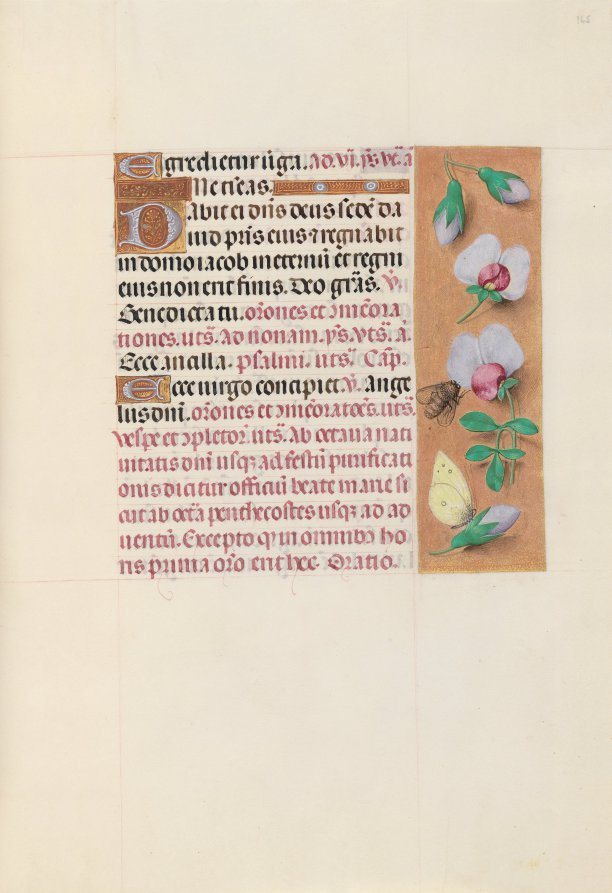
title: Hours of Queen Isabella the Catholic, Queen of Spain: Fol. 165r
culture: Flanders, Ghent and Bruges, late 15th century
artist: Master of the First Prayerbook of Maximillian (Flemish, c. 1444–1519)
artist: and Associates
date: c. 1500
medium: ink, tempera, and gold on vellum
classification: Bound Volume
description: This manuscript was illuminated by a circle of at least five highly organized manuscript painters active in the Flemish cities of Ghent and Bruges. The principal illuminator was Alexander Bening, who painted the majority of the book's miniatures. Manuscripts produced by this circle of artists are renowned for the decoration of their borders, which typically feature a rich variety of realistically-painted flowers, birds, and butterflies. This prayer book, called a book of hours, was intended not for a cleric, but for the private devotions of a lay person-in this case, Isabella the Catholic, Queen of Spain (1451-1504). Isabella's coat of arms embellishes the book's frontispiece. It is unlikely that the book was commissioned by the Queen herself; rather, she probably received it as a diplomatic gift from someone courting her patronage, perhaps Cardinal Francisco Jimenez de Cisneros. A Franciscan friar, Jimenez was dependent upon Isabella for his advancement, first to the post of Queen's confessor in 1492, and then to Archbishop of Toledo in 1495.